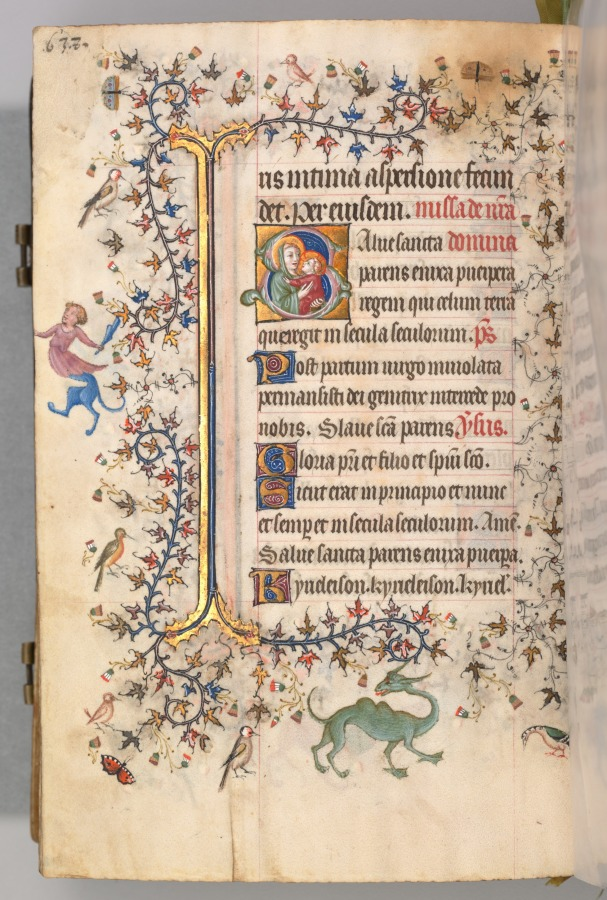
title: Hours of Charles the Noble, King of Navarre (1361-1425), fol. 313v, Virgin and Child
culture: France, Paris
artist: Master of the Brussels Initials and Associates (French)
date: c. 1405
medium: ink, tempera, and gold on vellum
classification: Bound Volume